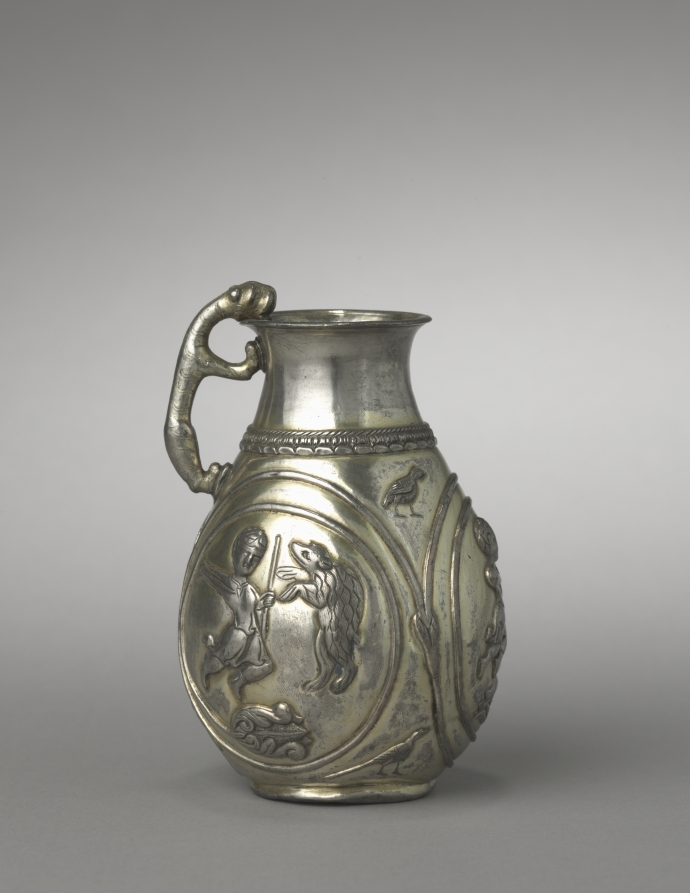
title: Hunt Pitcher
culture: Iran, Sasanian Empire (224–651 CE)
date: 500–600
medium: silver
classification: Metalwork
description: Every good Zoroastrian was supposed to spend one-third of his day farming; one-third philosophizing; and one-third eating, resting, and at pleasure. The abundance of Sasanian luxury goods is evidence of the importance accorded the last third of the day.